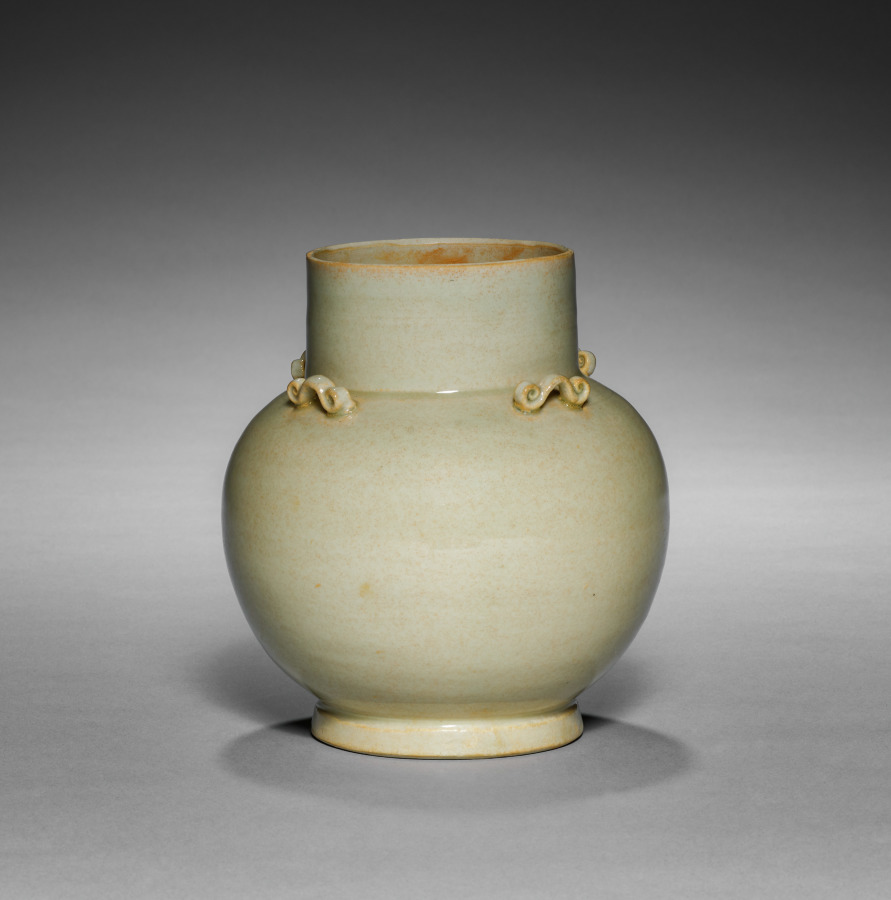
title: Globular Jar with Four Loops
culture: China, Southern Song dynasty (1127-1279)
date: 960–1279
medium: Porcelaneous ware of the qingbai type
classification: Ceramic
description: In the 900s, potters in southeast China excelled in producing white ceramics, including bluish-white (qingbai; 青白) glazed ware. The Keithleys’ jar was made when the qingbai ware–producing kilns were most active and manufactured their finest ware. The jar is missing its cover, which would have been flat with a loop in the center so that it could be tied in place with a string or silk cloth.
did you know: This container was probably used to store tea or grain.